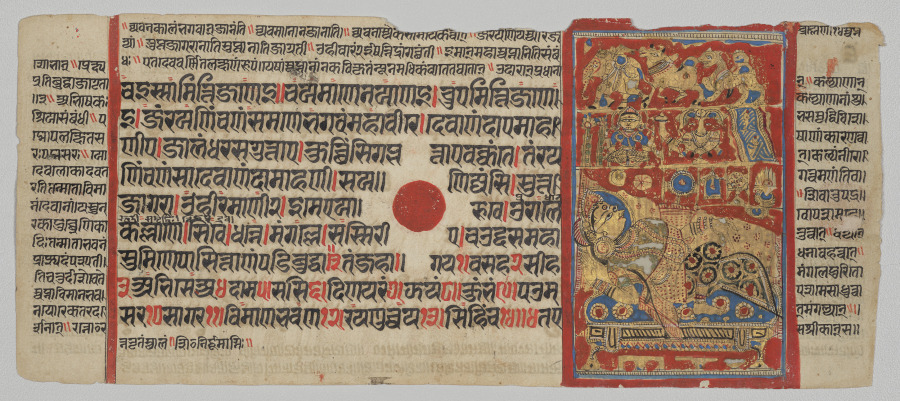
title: The Fourteen Dreams of the Brahman Woman Devananda, Folio 3 (recto), from a Kalpa-sutra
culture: Western India, Gujarat, last quarter of the 15th century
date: c. 1475–1500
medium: Gum tempera, ink, and gold on paper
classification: Painting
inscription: [[upper right]] brāhmaṇā 14 svapna